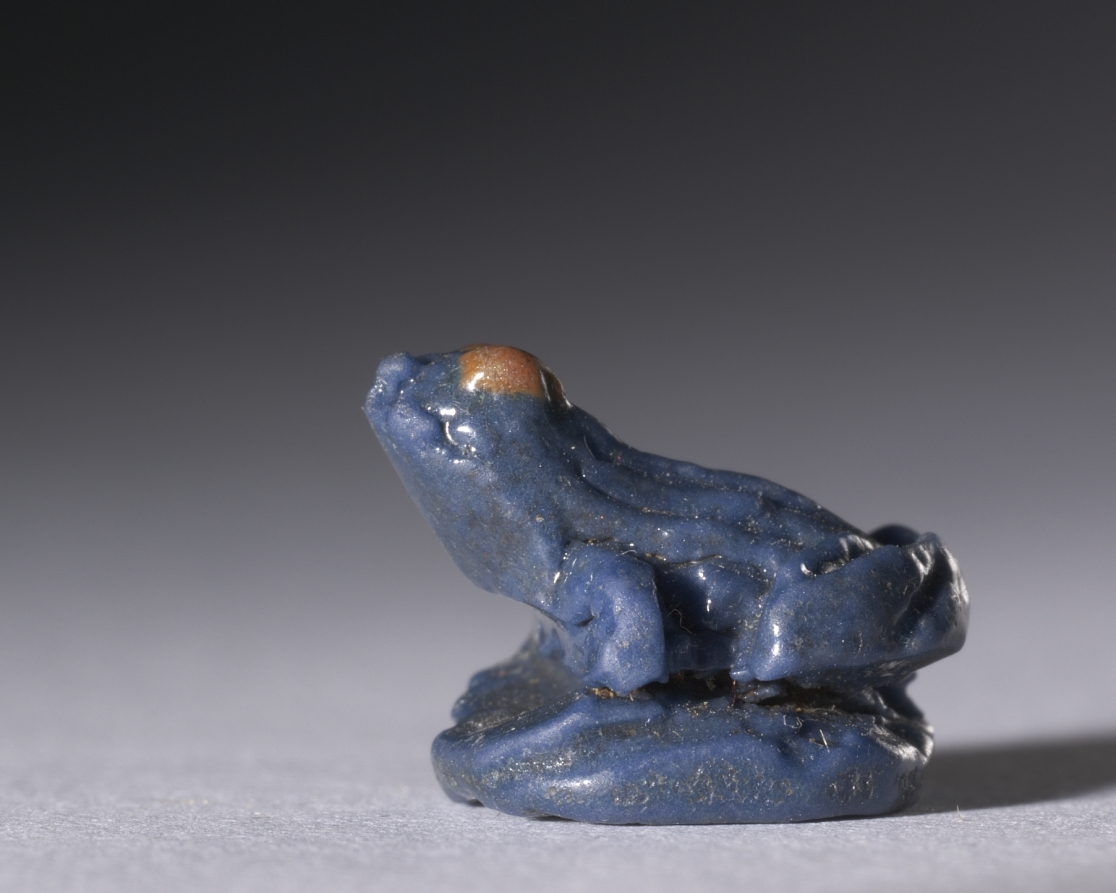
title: Frog Amulet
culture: Egypt, New Kingdom (1540–1069 BCE), Dynasty 18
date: c. 1380–1330 BCE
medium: polychrome faience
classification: Amulets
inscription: Inscribed "Nefer" (beautiful)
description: The frog, because of its numerous offspring, was a symbol of fertility. In fact, the hieroglyphic sign for 100,000 was a tadpole. Frog amulets were very popular both in semiprecious stone and in faience, and were worn by women hoping for an easy delivery. Both sexes wore the frog in expectation of a successful rebirth in the afterlife.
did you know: This frog amulet was made from faience, a fine type of self-glazing ceramic that is characteristically turquoise blue. It is a representation of Heqet, the frog goddess associated with childbirth and fertility.